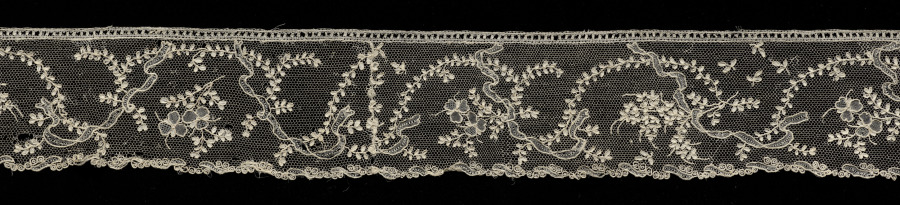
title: Lace Edging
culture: France, Alençon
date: 1740–60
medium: Needle lace (Point d'Alençon)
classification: Lace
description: With its flowing ribbon and garland pattern, this lace edging is from the late Louis 15th period or early Louis 16th period.